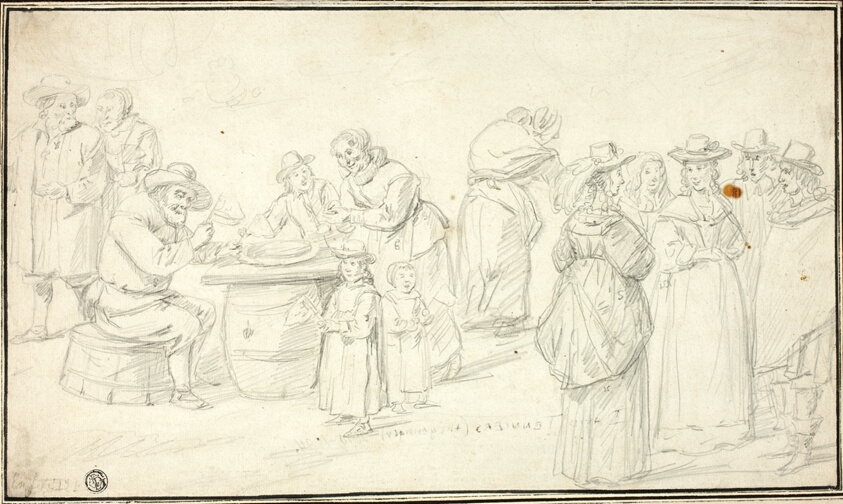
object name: Drawing and Watercolor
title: Study for Country Festival near Antwerp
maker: David Teniers the Younger (Flemish, 1610-1690)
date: c. 1646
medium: Graphite on ivory laid paper, tipped onto ivory laid paper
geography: Flanders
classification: graphite; drawings (visual works); prints and drawing